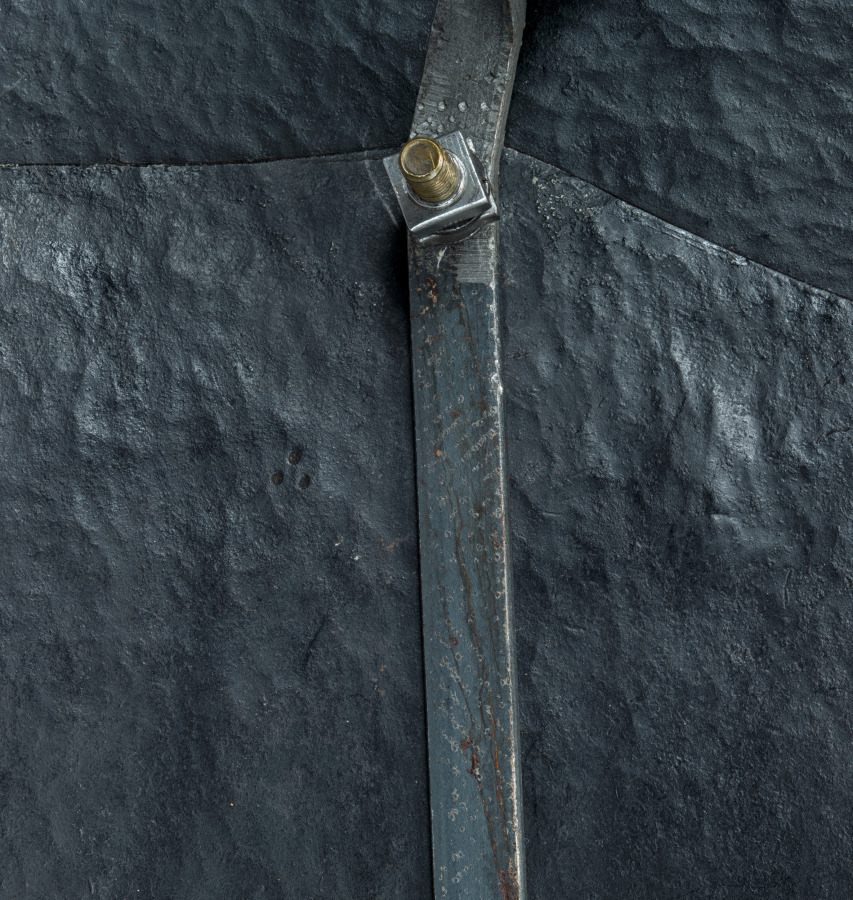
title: Pommel Plate of a Saddle (from the Garniture of Rudolf II)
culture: Germany, Augsburg, 16th century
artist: Anton Peffenhauser (German, 1525–1603)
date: c. 1571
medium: blued, etched, and gilded steel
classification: Arms and Armor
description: This plate, one of two and once part of a saddle, is from tournament armor made for man and horse made for the sons of Emperor Maximilian II, archdukes Rudolf and Ernst. Most of the remaining elements of this armor are still in the collections of the Imperial Armouries in Vienna. The decorative pattern (in the imperial colors of black and gold) forms elegant knots, with distinctive foliage and hop sprigs filling the loops.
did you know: Once part of a saddle, this plate protected the rider's thigh.